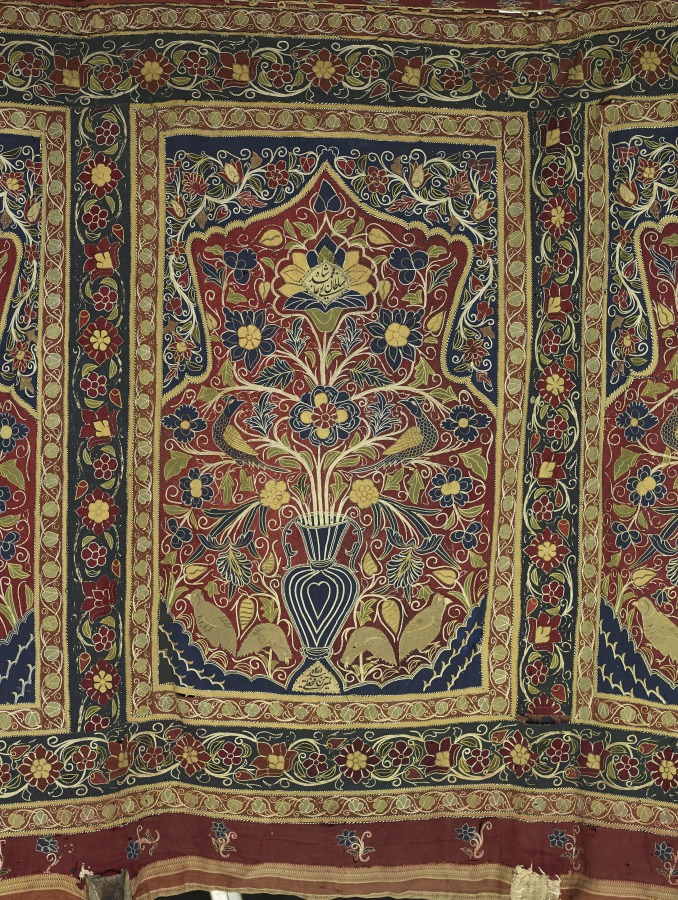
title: Royal Round Tent made for Muhammad Shah (wall panel with three design units)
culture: Iran, Rasht, Qajar period (1779-1925)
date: 1834–48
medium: Interior: wool: plain weave, inlaid work; silk: embroidery, chain stitch; tape, leather; Exterior: cotton, wool: plain weave; rope, iron ring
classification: Textile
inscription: Inscriptions: The central design unit of this wall panel has two embroidered inscriptions. 1. Upper inscription (center of the top blossom): "Muhammad shah sultan-e ghazi."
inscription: 2. Lower inscription (on the base of the vase): "Kamtarin bandeh-ye dargah fath'ali."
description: Royal tents were potent symbols of authority, wealth, and power throughout the greater Middle East. Rulers owned thousands of tents. They were used for shelter, shade, and innumerable functions in tent compounds that were essential for imperial ceremonies, travel, and military campaigns. Distinguished by size with elaborately decorated interior walls and ceilings, tents could be as large as castles. Opulent tents were also presented as imperial gifts. Tents are only known through documents before 1600. For example, in Baghdad in 809, Caliph Harun al-Rashid owned 4,000 ceremonial tents and 150,000 camping tents that were stored in the imperial Abbasid treasury. An astonishing variety and quantity of tents were housed in the royal Fatimid tent storeroom in Cairo in 1068-69, including "military tents, fortress tents, and castle tents, manufactured of . . . gold-brocaded stuff embroidered with designs of elephants, wild beasts, horses, peacocks, birds." Since 1600, Ottoman Turkish tents with elaborate floral decoration have been preserved in Istanbul in the Topkapi Palace Museum and Military Museum, and in European collections as war booty, primarily from the Ottoman Turks' attempt to conquer Vienna in 1683. These tents are not done in the Rasht technique, but rather are applique. In contrast, royal tents from Iran are extremely rare. This spectacular ceremonial tent is embroidered with the name of its owner, Muhammad Shah, who ruled Iran from 1834 to 1848 during the Qajar dynasty. The radiant jewellike interior features exuberant flora, blossoming vines, and robust birds made with colored wool embellished with silk-thread embroidery.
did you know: Rasht work is named after the city on the Caspian Sea in present-day Iran, which was a major silk trade center with numerous textile workshops.